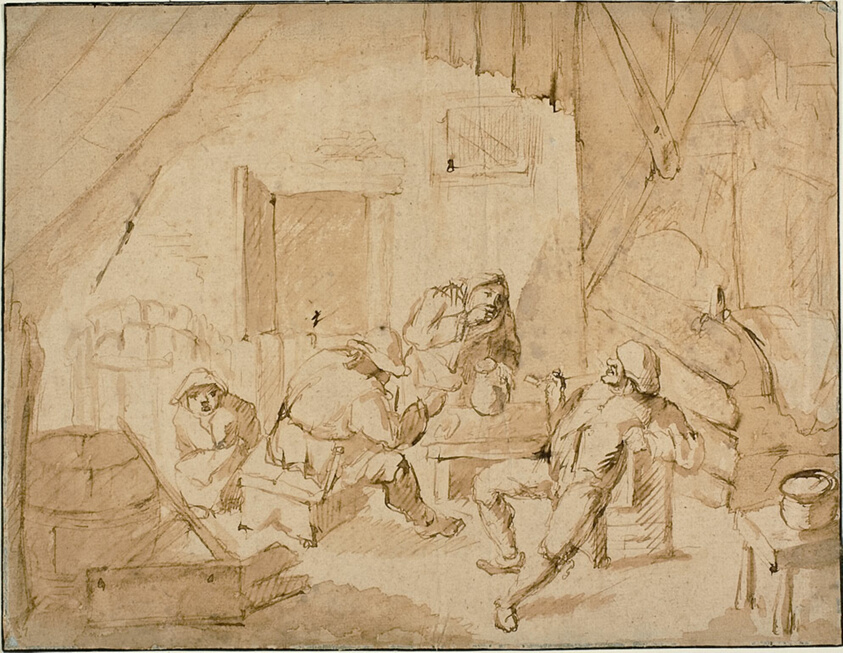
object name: Drawing and Watercolor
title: Peasants Drinking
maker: Attributed to Isaac van Ostade (Dutch, 1621-1649); or Adriaen Brouwer (Flemish, 1605/06-1638)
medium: Pen and brown ink, with brush and brown wash, on buff laid paper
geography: Netherlands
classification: ink or chalk wash; drawings (visual works); prints and drawing